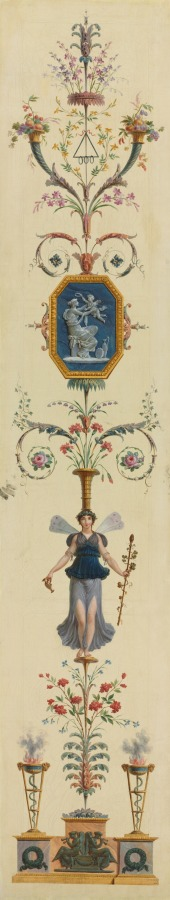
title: Decorative Panel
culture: France, 18th century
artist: Pierre Rousseau (French, 1751–1829)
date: 1790s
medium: oil on canvas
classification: Painting